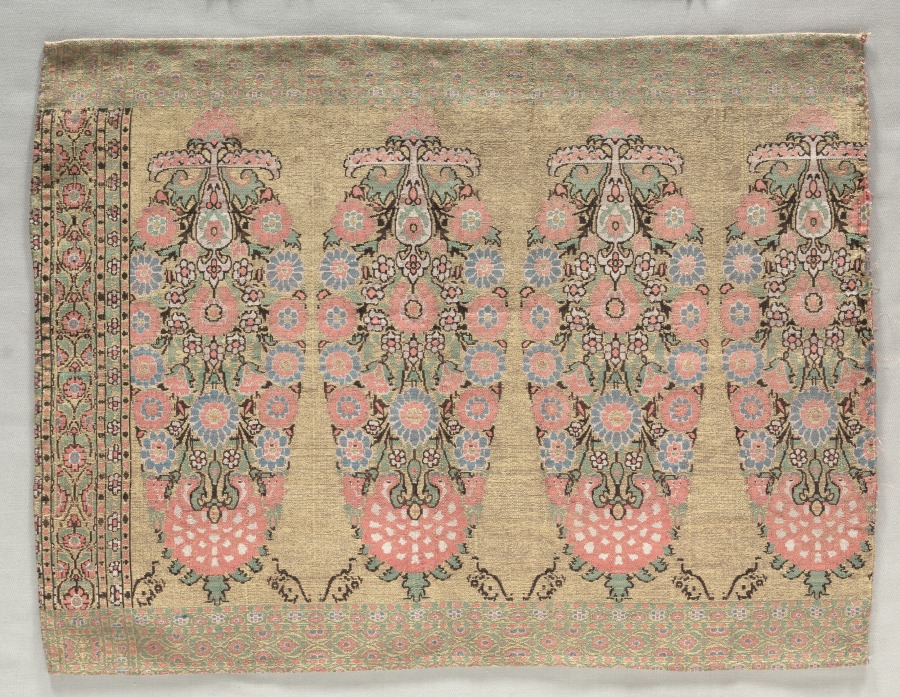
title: Two Pieces from a Scarf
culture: Iran, 18th century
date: 1700s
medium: brocade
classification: Textile